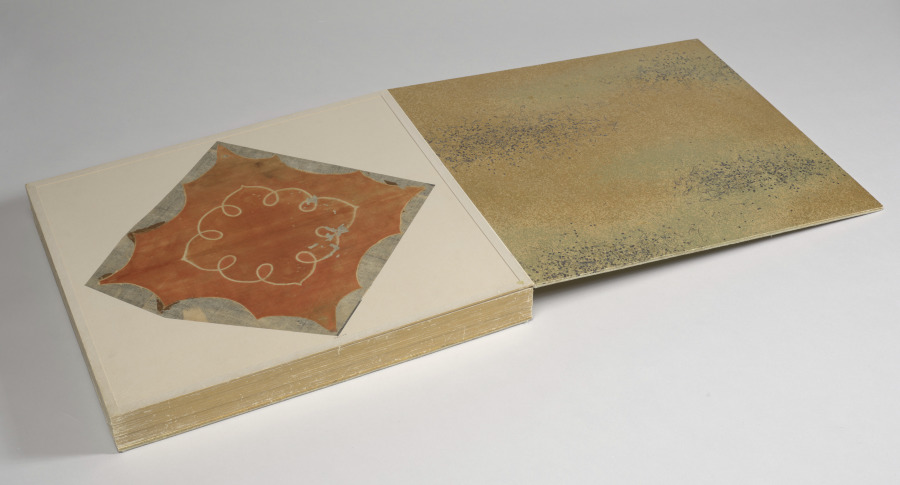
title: Album of Textile Samples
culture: China, Tang dynasty (618–907) or Japan, Nara period (710–794)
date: 700s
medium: silk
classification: Textile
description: The album contains an important collection of early East Asian textiles. There are fifty-five fragments in the album representing forty-five different textiles. The fragments vary in size from the smallest, about an inch square, to the largest, which is fifteen inches square. With three exceptions, the pieces are of silk. The techniques represented include plain cloth and gauzes, either monochrome or with printed decoration, and damask-like weaves with a ground in plain cloth and a pattern in twill and one example with the ground in weft twill and the pattern in warp twill. The compound weaves include one example of a compound warp-face cloth, a technique that had all but died out after Han times, and a number of compound twills with a variety of elaborate decorative motifs, which are among the most important and interesting in the collection. There are one embroidery and one fragment of silk tapestry.